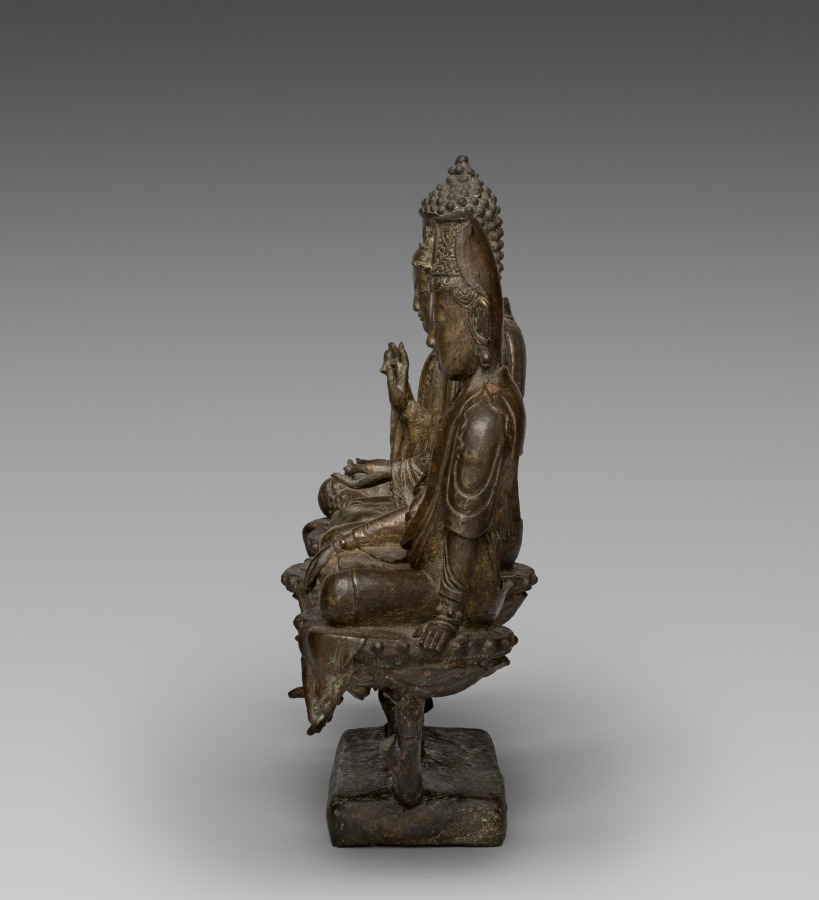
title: Amitabha Triad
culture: Korea, Joseon dynasty (1392–1910)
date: 1400s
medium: bronze with traces of gilding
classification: Sculpture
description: This bronze triad depicts Amitabha, the Buddha of Western Paradise, at the center, flanked by two bodhisattvas: Ksitigarbha on his left and Avalokiteśvara on his right. Ksitigarbha is believed to rescue those tormented beings from purgatory, while Avalokiteśvara offers relief to those suffering in the mortal realm. An exceptionally rare statue from the 1400s, this piece entered the CMA’s collection in 1918. It was discovered in Korea in 1916 by Langdon Warner (1881–1955), who was serving as the CMA’s field agent. In a letter dated December 4, 1916, Warner expressed not only his excitement upon finding the triad in a local pawn shop but also his satisfaction at purchasing it at a significantly reduced price.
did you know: The small scale suggests that this rare bronze triad might have been displayed in a personal shrine rather than a large worship hall.